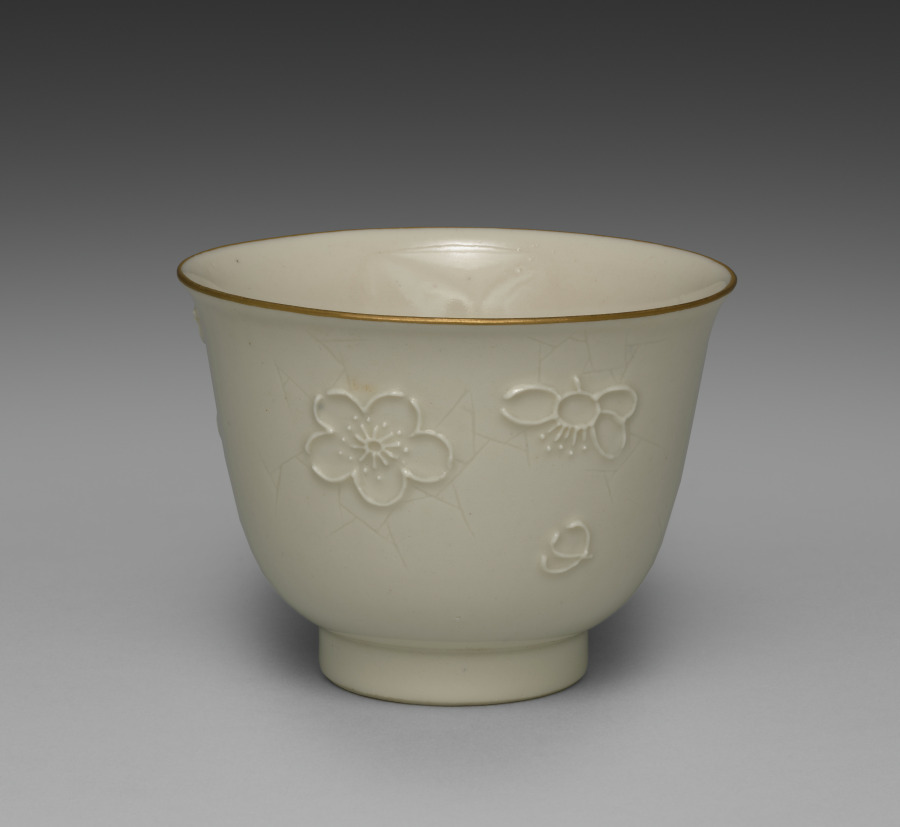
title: Drinking Cup from Dining Set with Plum Blossoms and Cracked-Ice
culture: Japan, Meiji period (1868–1912)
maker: Seifū Yohei II (Japanese, 1844–1878)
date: c. 1875–78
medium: Porcelain with molded designs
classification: Ceramic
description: Each item in this set has a delicate low-relief design of flowering plum branches over scattered, intersecting lines meant to resemble the cracked-ice surface of a frozen body of water and is signed on the base in gold pigment. While Yohei II produced many fine works in underglaze blue, like those produced by Kiyomizu Shichibei, he also made works in quite different styles later in his career, from the early 1870 s. In 1873, he was appointed purveyor to the Industrial Center of Kyoto Prefecture, a designation associated with Kyoto’s efforts to reach an international market through the port of Kobe; and from 1875 until his death, he was involved in national-level projects to present Japanese ceramics across the world. It was during this period that Yohei III was apprenticed to Yohei II, and it has been suggested that this set may in fact be an early example of Yohei III’s work, which he signed with his teacher’s name. Decorated with flowers resembling Japanese textile motifs, the set calls to mind the design of Yohei II’s pair of vases with plum blossoms in the Victoria and Albert Museum. Here, the elaborate trees created for a formal public exhibition setting have been translated into the approachable blossoms of the genteel domestic environment. While the designs are consistent across the pieces, each raised flower petal and pistil and each incised line in the ice was done by hand, so the cups, bowls, and dishes are similar yet unique. The bottoms of two boxes once identified the set’s owner, but the information has been deliberately obscured with black ink. However, inscriptions still visible appear to indicate two occasions, once at the end of July 1886 , and once again in June 1916 , when parts of the set were requested from Hokura in Niigata Prefecture. The location corresponds to a neighborhood in the present-day city of Jōetsu. The surname Tsuji 辻 also appears on a paper tag affixed to one of the box cloths. Future research may possibly reveal more about their provenance. A vase by Yohei III in a private collection combines the formal grandeur of the Yohei II vases in the Victoria and Albert Museum with the gentler design of this dining set, placing flowering plum trees against soft, scalloped-edge clouds resembling those in golden screens.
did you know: The dining wares have a creamy white coloration that the four boxes containing them identify as Korean in style.